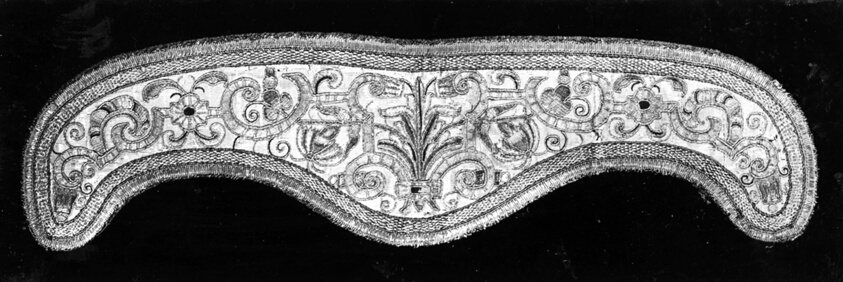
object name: Religious/Ritual Object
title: Amice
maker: Spain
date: 17th century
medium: Silk, plain weave with gilt-metal strip facing wefts; embroidered with silk and gilt-metal-strip-wrapped silk in satin, split, raised stem, and stem stitches; couching; a: cords of silk, oblique interlacing; tassel of silk, oblique interlacing and a knotting technique known as macramé with cut fringe (no cords or tassel on b)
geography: Spain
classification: needlework (visual works); ritual objects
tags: vestments